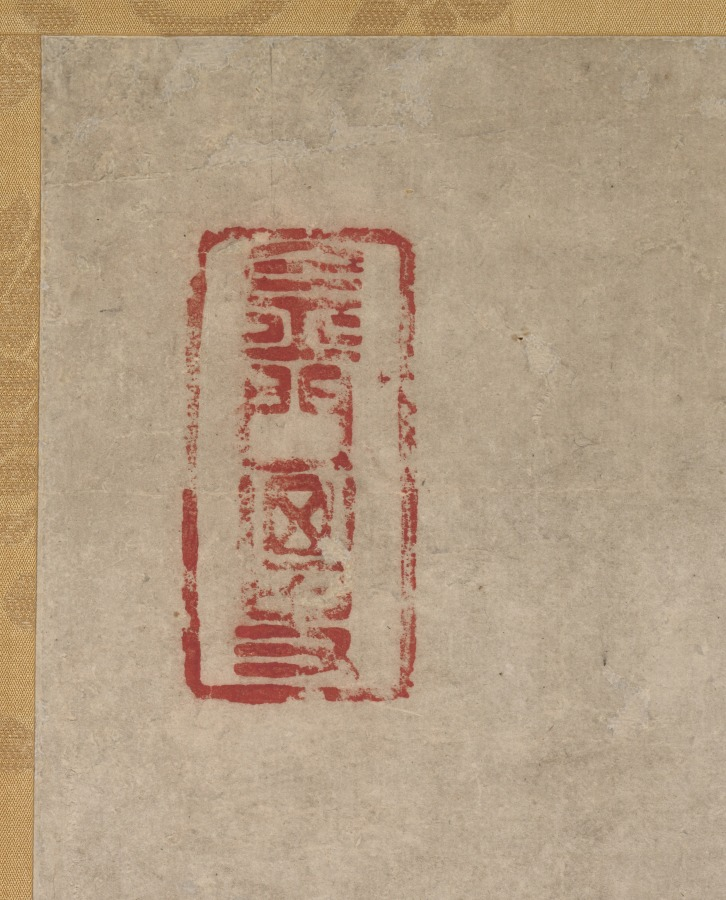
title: Prunus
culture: Japan, Edo period (1615–1868)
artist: attributed to Kano Einō (Japanese, 1631–1697)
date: mid- to late 1600s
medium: hanging scroll; ink on paper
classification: Painting